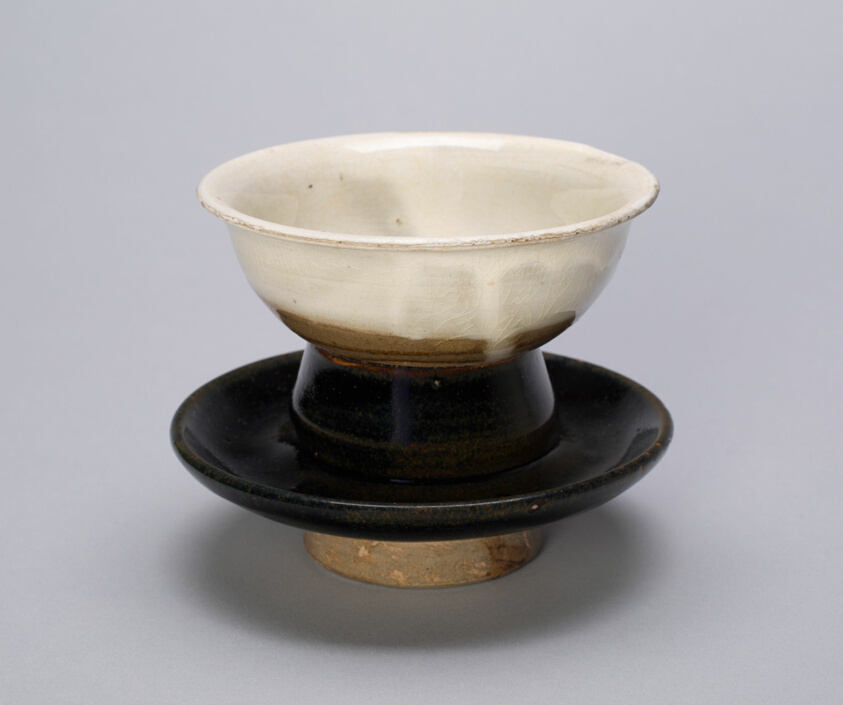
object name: Vessel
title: Cup and Cupstand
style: Chinese (culture or style)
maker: China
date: Song (960–1279) or Jin dynasty (1115–1234), c. 12th century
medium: Northern blackware, Cizhou type; glazed stoneware with dark bronze glaze (saucer); white slip under transparent glaze (cup)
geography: China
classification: drinking vessel; ceramics; vessel